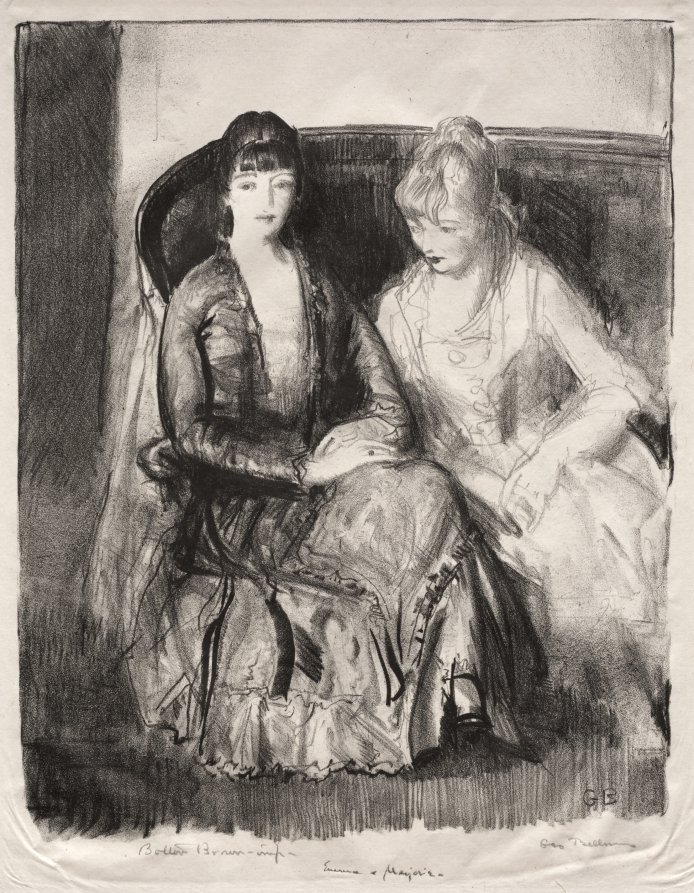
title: Emma and Marjorie on a Sofa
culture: America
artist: George Bellows (American, 1882–1925)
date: 1921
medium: lithograph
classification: Print